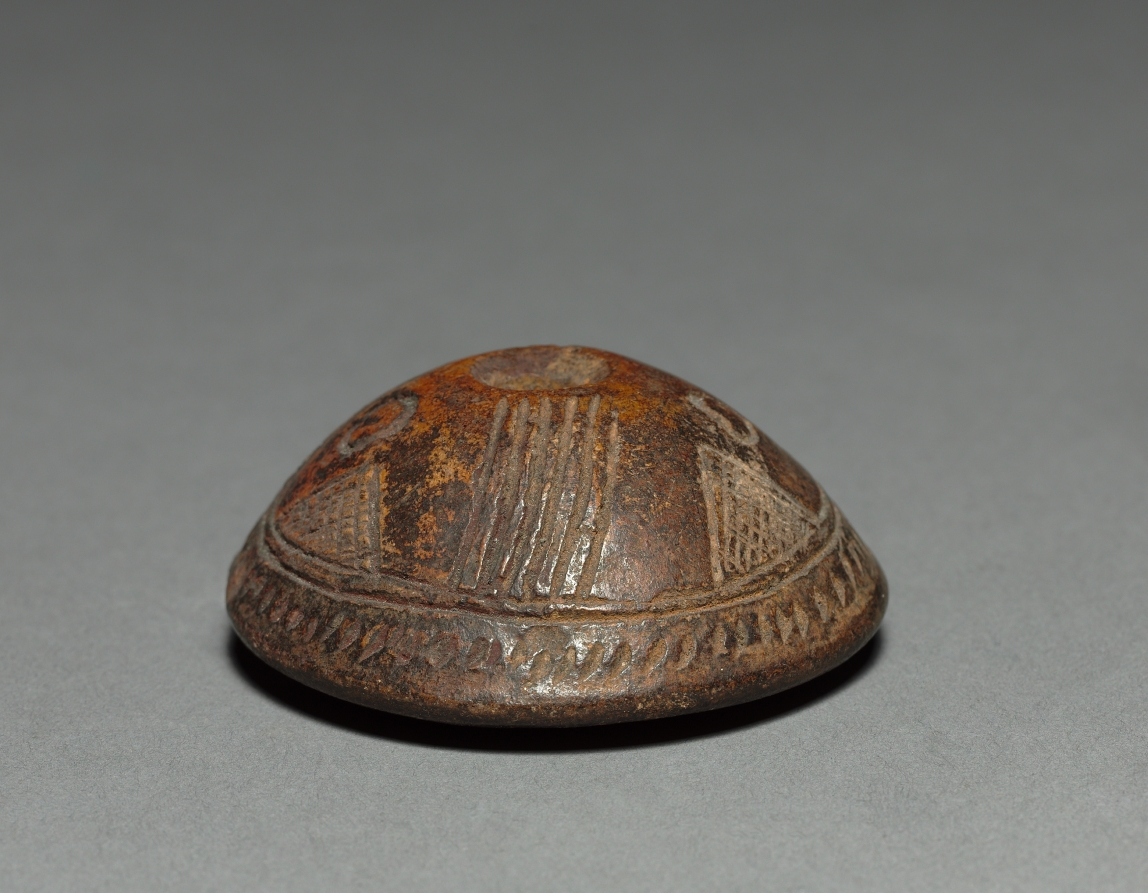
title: Spinning Whorl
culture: Colombia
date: before 1921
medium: red ware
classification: Ceramic